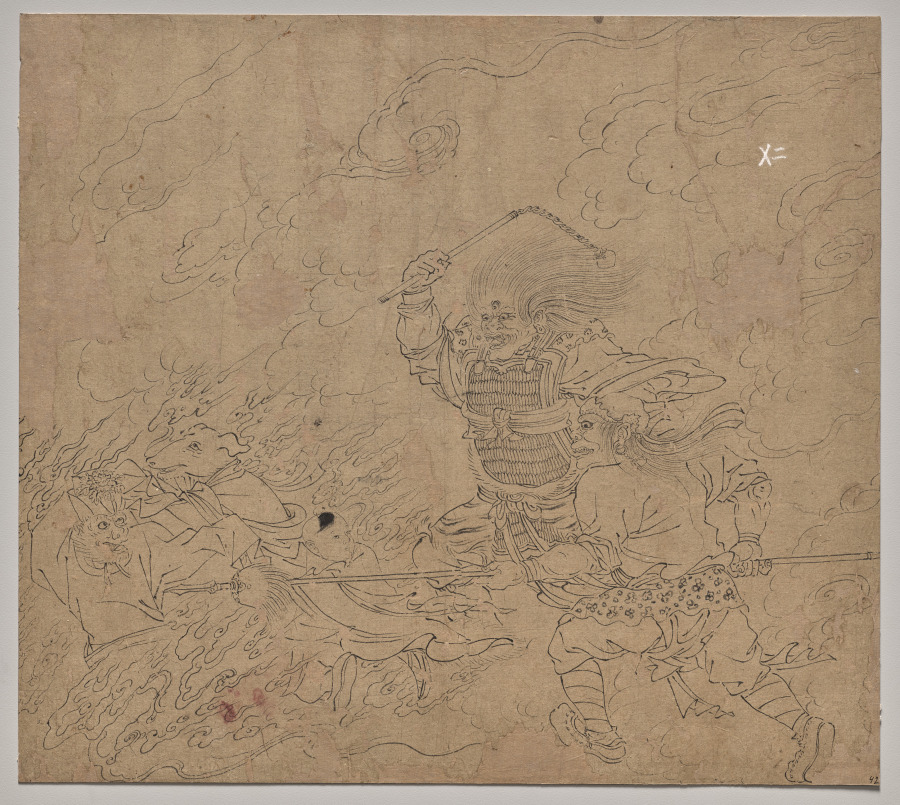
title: Album of Daoist and Buddhist Themes: Search the Mountain: Leaf 42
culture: China, Southern Song dynasty (1127-1279)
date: 1200s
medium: Album, ink on paper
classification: Painting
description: This extraordinary album has 50 paintings on a variety of religious subjects. They were likely created by several master craftsmen to share with studio apprentices as models for fulfilling commissions. The Jade Emperor and the Daoist pantheon make up the first 26 leaves. The next 14 leaves portray the Buddhist Ten Kings of Hell administering punishments to the dead. The third section, called “Clearing the Mountains,” features divine soldiers, led presumably by the deity Erlang Shen 二郎神, fighting undesirable creatures.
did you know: Part-human part-animal figures surrounded by flames are chased by two demon-soldiers, one wielding a whip or club and the other a spear.